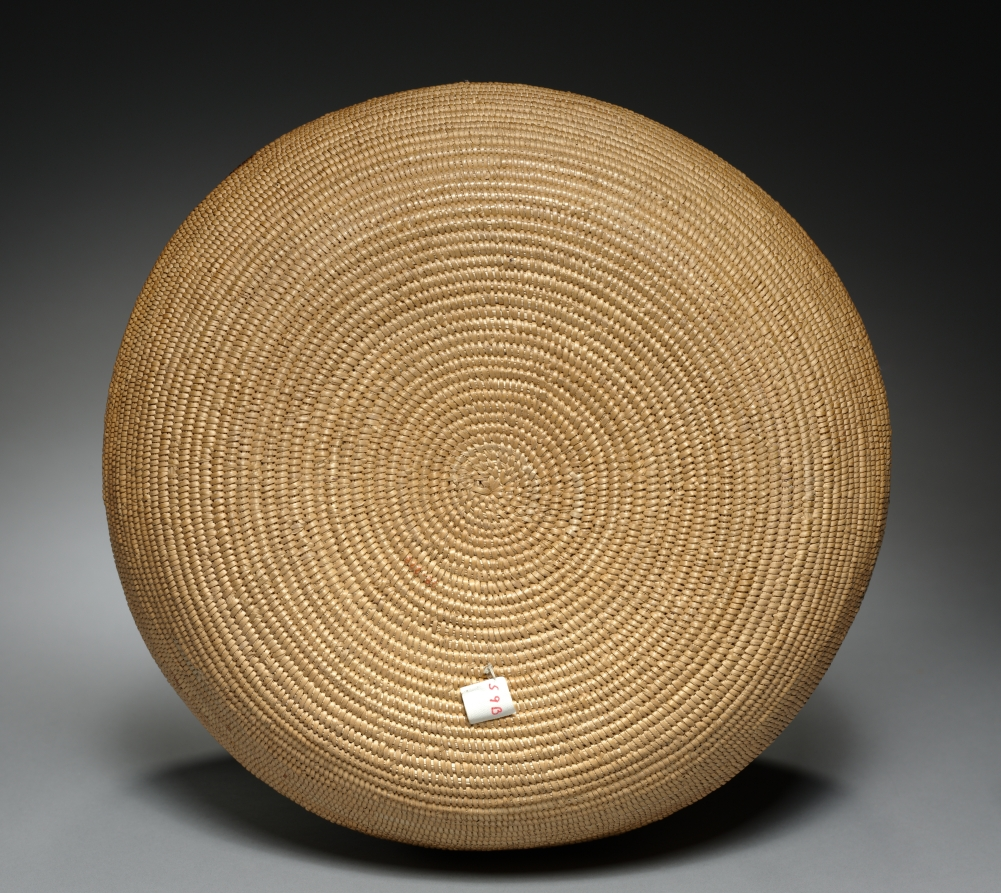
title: Gift Basket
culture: California, Cahuilla (Mission, Saboba Mission), Unassigned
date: c. 1900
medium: Juncus, sumac; coiled, deergrass bundle foundation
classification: Basketry